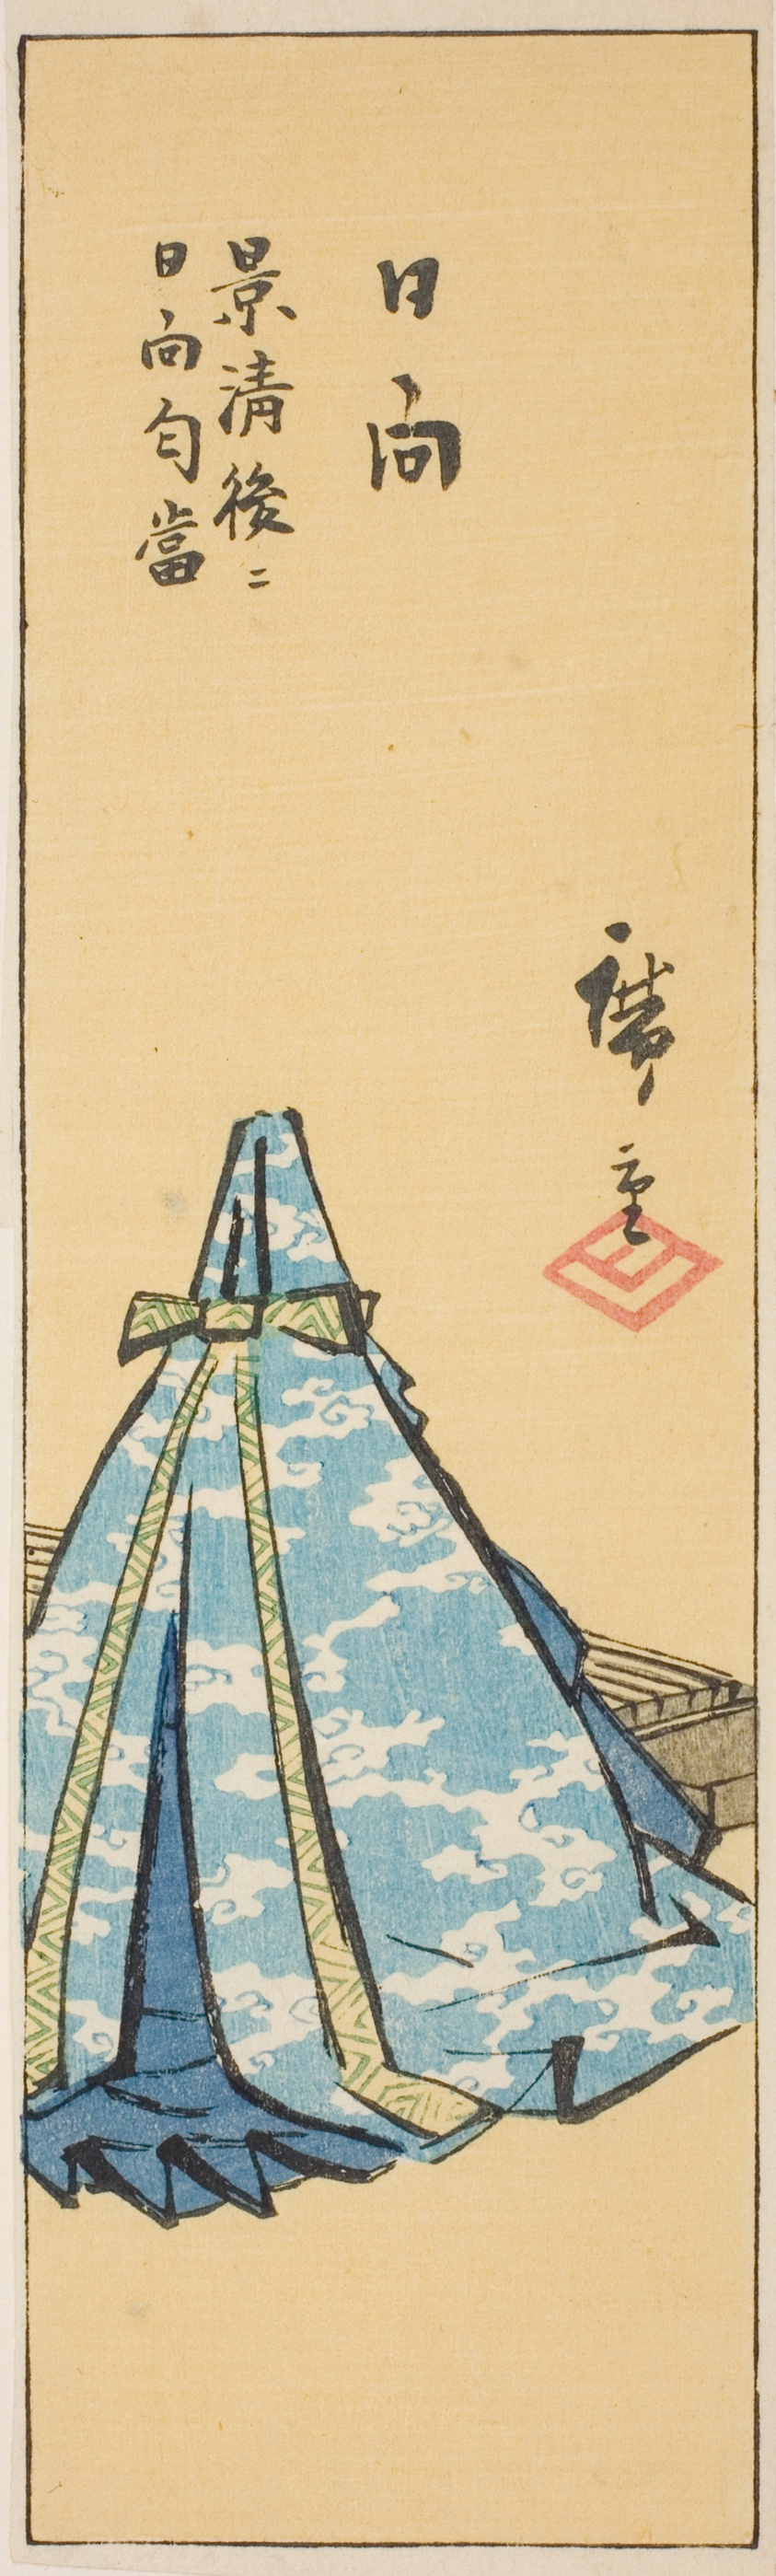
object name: Print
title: Hyuga, section of sheet no. 18 from the series "Cutout Pictures of the Provinces (Kunizukushi harimaze zue)"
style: Japanese (culture or style)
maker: Utagawa Hiroshige 歌川 広重; Japanese, 1797-1858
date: 1852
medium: Color woodblock print; section of harimaze sheet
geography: Japan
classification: woodblock print; print; asian art